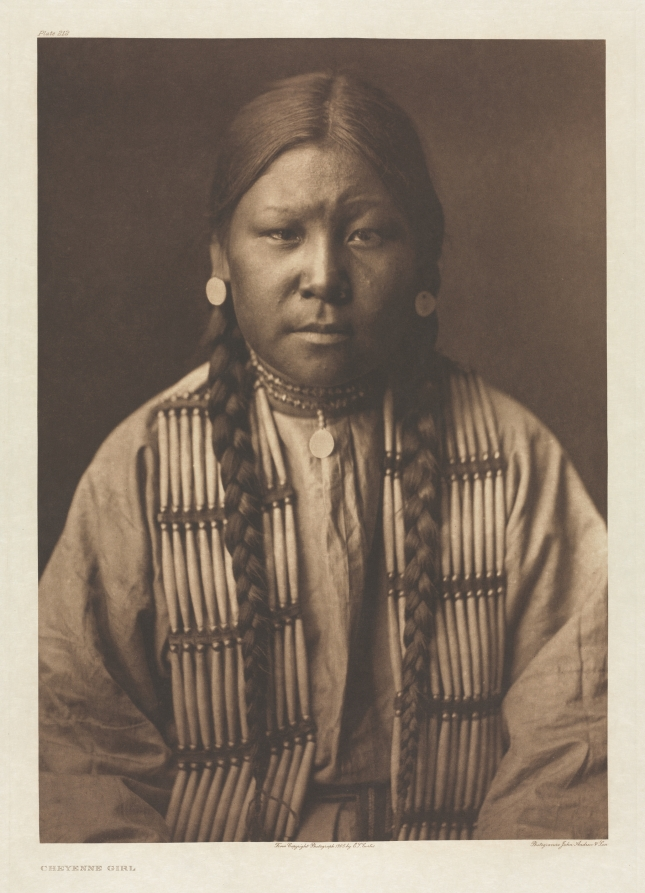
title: Portfolio VI, Plate 212: Cheyenne Girl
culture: America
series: The North American Indian: being a series of Portfolios picturing and describing the Indians of the United States, the Dominion of Canada, and Alaska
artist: Edward S. Curtis (American, 1868–1952)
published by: The University Press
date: 1905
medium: photogravure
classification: Portfolio